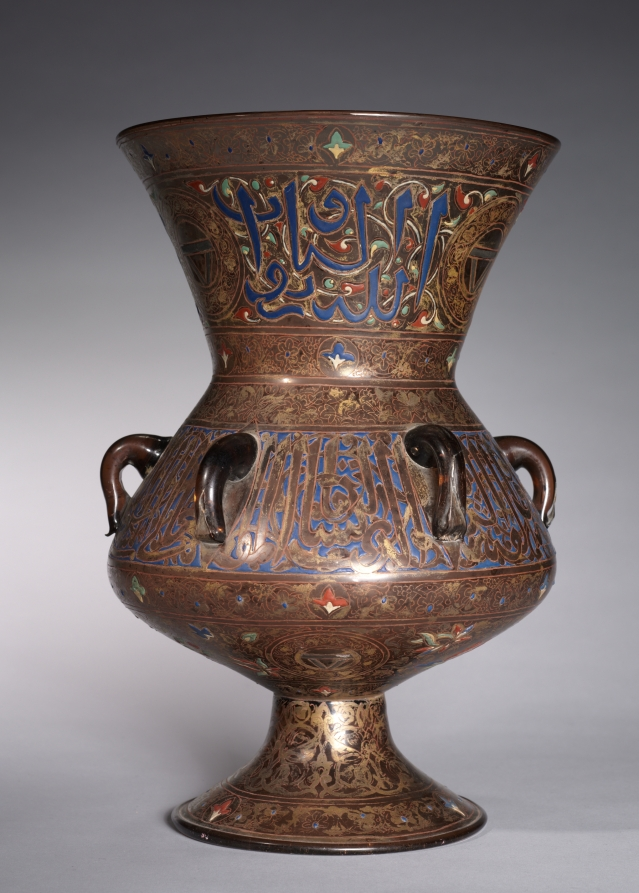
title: Mosque Lamp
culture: France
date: late 1800s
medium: glass with enameled and gilded decoration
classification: Glass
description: In late 1800s Europe, there was a renewed interest in art from the Islamic world. Mosque lamps, made for Mamluk rulers and their high officials in the 1300s, were particularly prized. Phillippe-Joseph Brocard, a Parisian collector and craftsman, is renowned for reviving the Mamluk technique of enameling and gilding glass and produced many lamp reproductions. This lamp used to be in his collection and it is possible that it was made by him. The top Qur’anic inscription likens divine light to a shining glass lamp.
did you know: This colorful lamp would have been suspended by its six handles. When lowered to refill its oil, it could stand securely on its splayed foot.